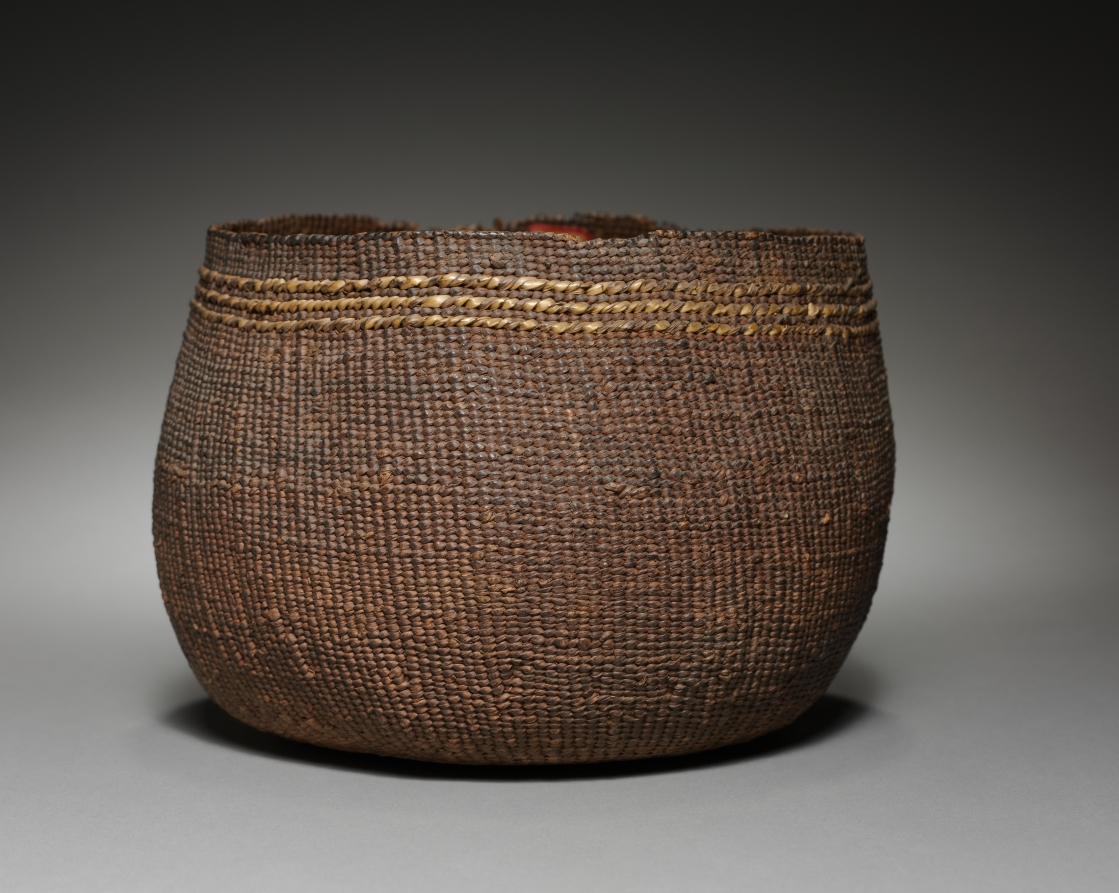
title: Cooking Bowl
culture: California (?), Native American, Unassigned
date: before 1927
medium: twined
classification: Basketry